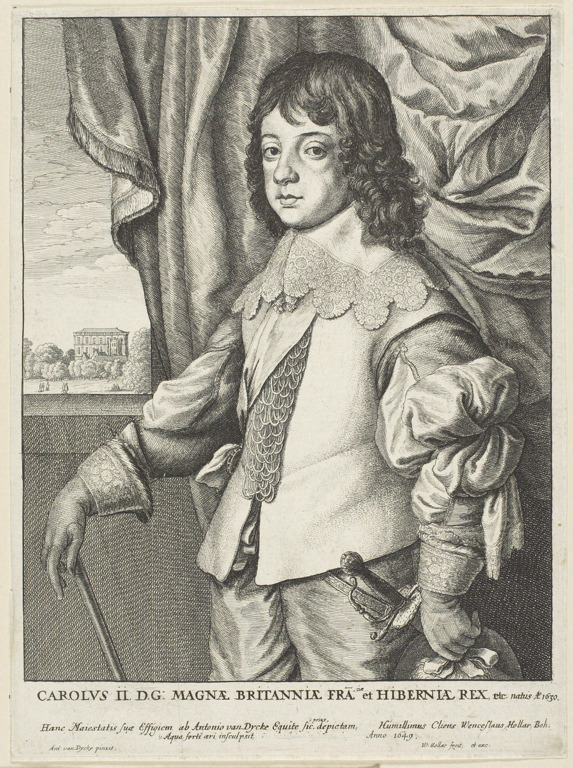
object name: Print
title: Charles II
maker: Wenceslaus Hollar (Bohemian, 1607-1677); after Anthony van Dyck (Flemish, 1599-1641)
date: 1649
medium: Etching in black on ivory laid paper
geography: Bohemia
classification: etching; print; prints and drawing